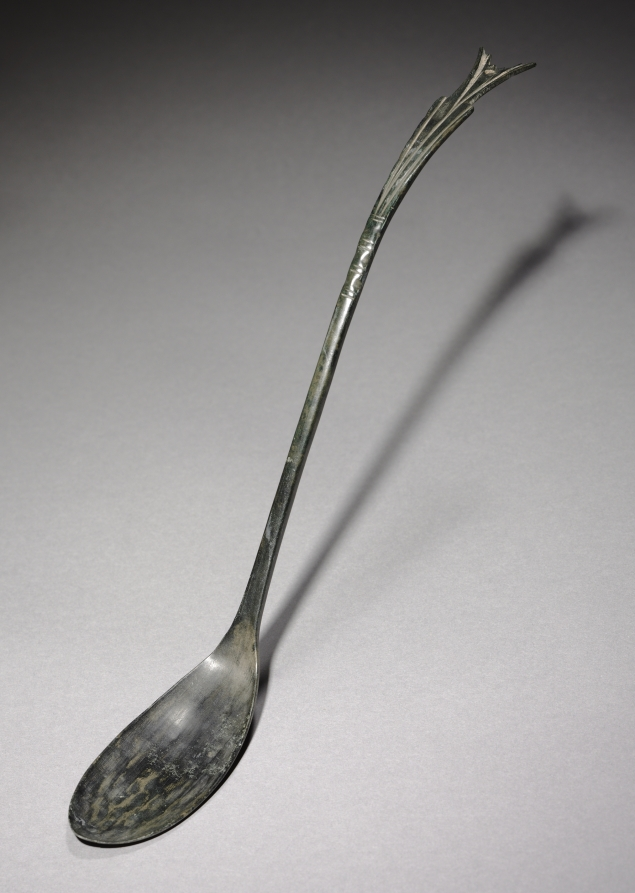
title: Spoon with Fish-Tail Design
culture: Korea, Goryeo dynasty (918–1392)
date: 918–1392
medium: bronze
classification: Metalwork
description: Many of Goryeo period spoons like this one feature a curved handle that splits into a jagged fishtail design. This fishtail design is not unique to Korea; it was also widely used in the area under the rule of two non-Han Chinese states: Liao (907–1125) and Jin (1115–1234). These seemingly ordinary objects testify to exciting material interactions between the Goryeo dynasty and non-Han Chinese northern states, which were often omitted from the official records.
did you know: Bronze spoons are the most common burial item. Scholars have proposed that toward the end of the 14th century, Koreans enjoyed meat-based soups more than any other dishes, explaining why spoons became common household items as well as burial goods.